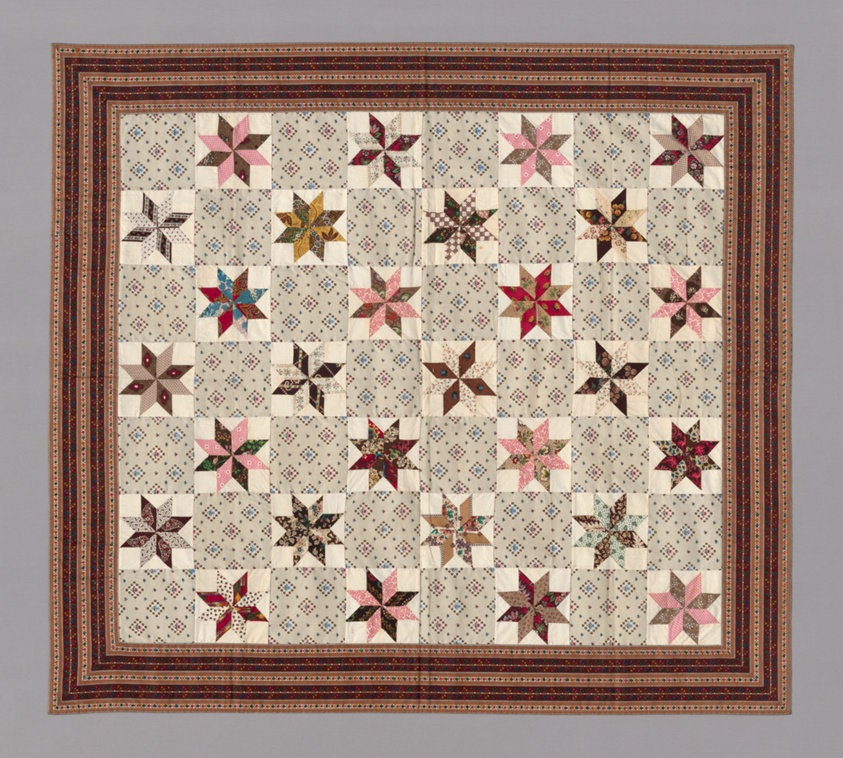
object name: Textile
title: Table Cover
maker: United States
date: 1875/1900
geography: United States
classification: textile; needlework - quilt